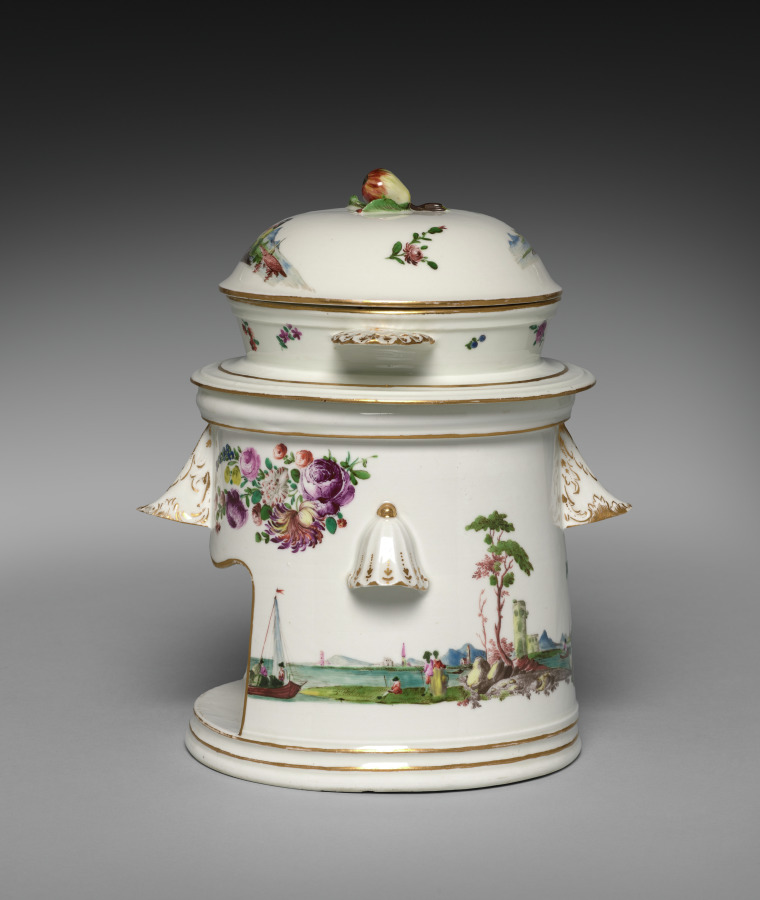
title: Food Warmer (Veilleuse)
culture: Germany, Nymphenburg, 18th century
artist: Nymphenburg Porcelain Factory (German, founded 1747)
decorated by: probably by Georg Christoph Lindemann (German)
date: c. 1758–1760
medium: porcelain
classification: Ceramic